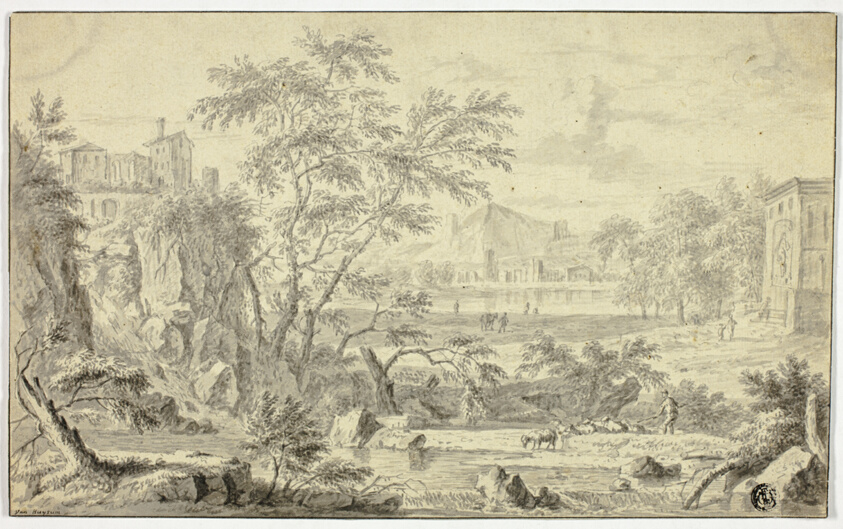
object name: Drawing and Watercolor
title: Italianate Landscape with Shepherd and Flock by Stream, Town in the Distance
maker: Jan van Huysum (Dutch, 1682-1749)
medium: Pen and gray ink, with brush and gray wash, over traces of black chalk, on ivory laid paper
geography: Holland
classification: ink or chalk wash; drawings (visual works); prints and drawing